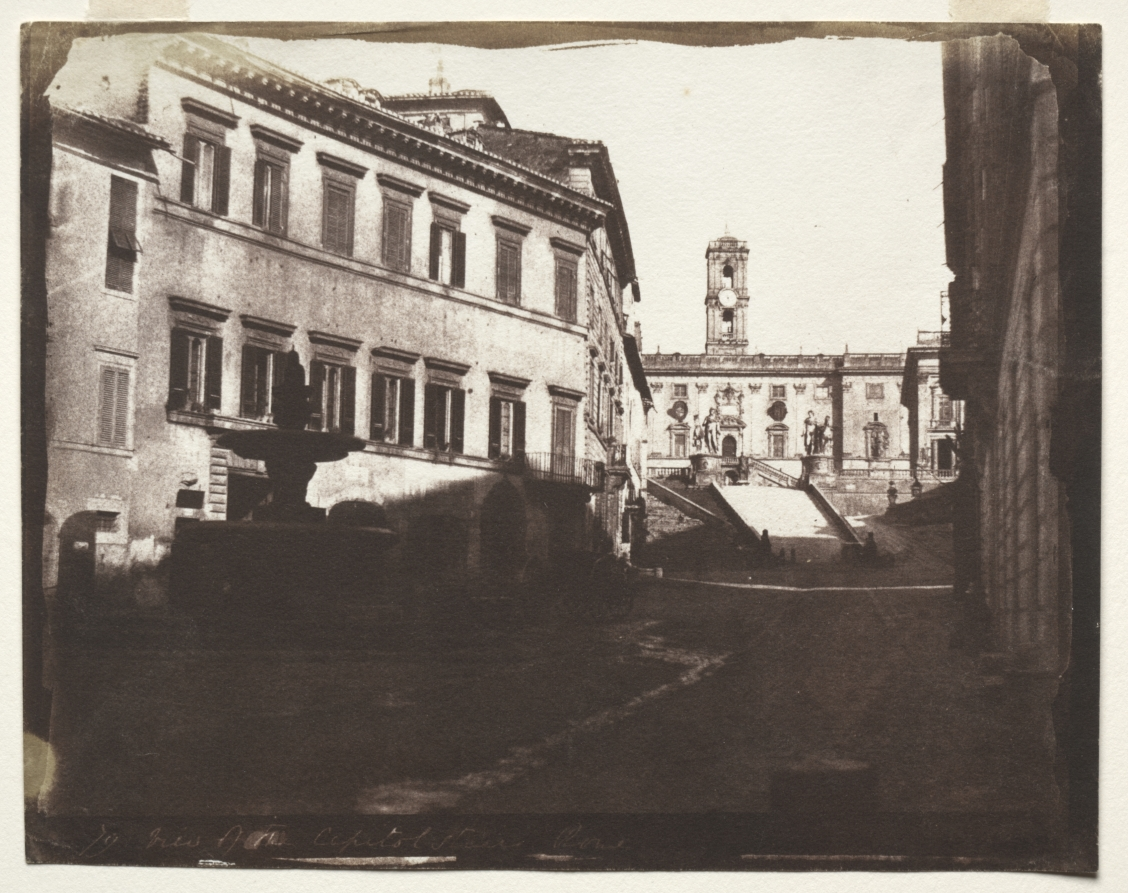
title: View of the Capitol Stairs, Rome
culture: England, 19th century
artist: Calvert Richard Jones (British, 1804–1877)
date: 1846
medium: salted paper print from calotype negative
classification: Photograph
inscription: Written in negative: "19(?). View of the Capitol Stairs. Rome."; written in graphite on verso: "Rome/x2667"; in black ink on verso: "LA396"